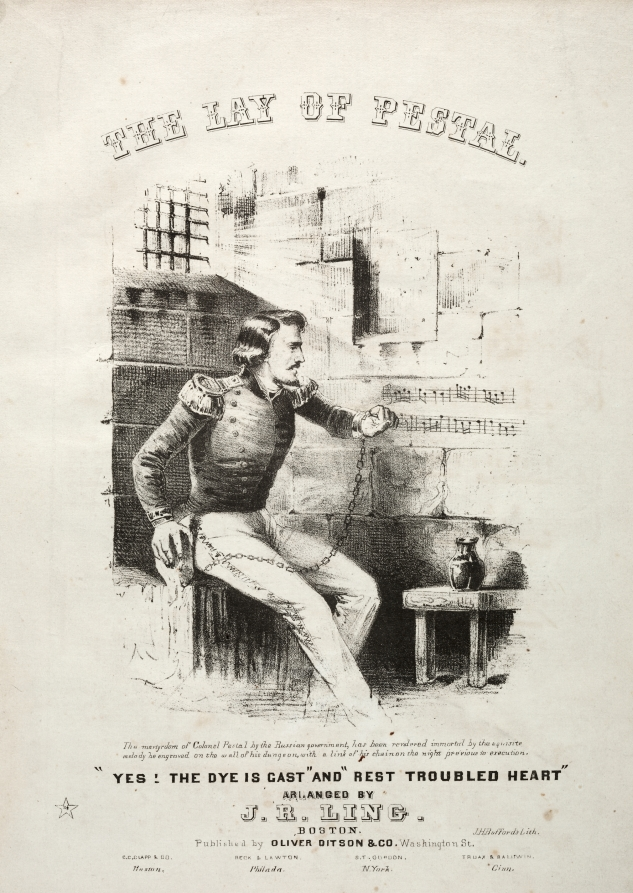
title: The Lay of Pestal - Sheet Music Cover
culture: America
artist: Winslow Homer (American, 1836–1910)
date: c. 1850s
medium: lithograph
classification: Print